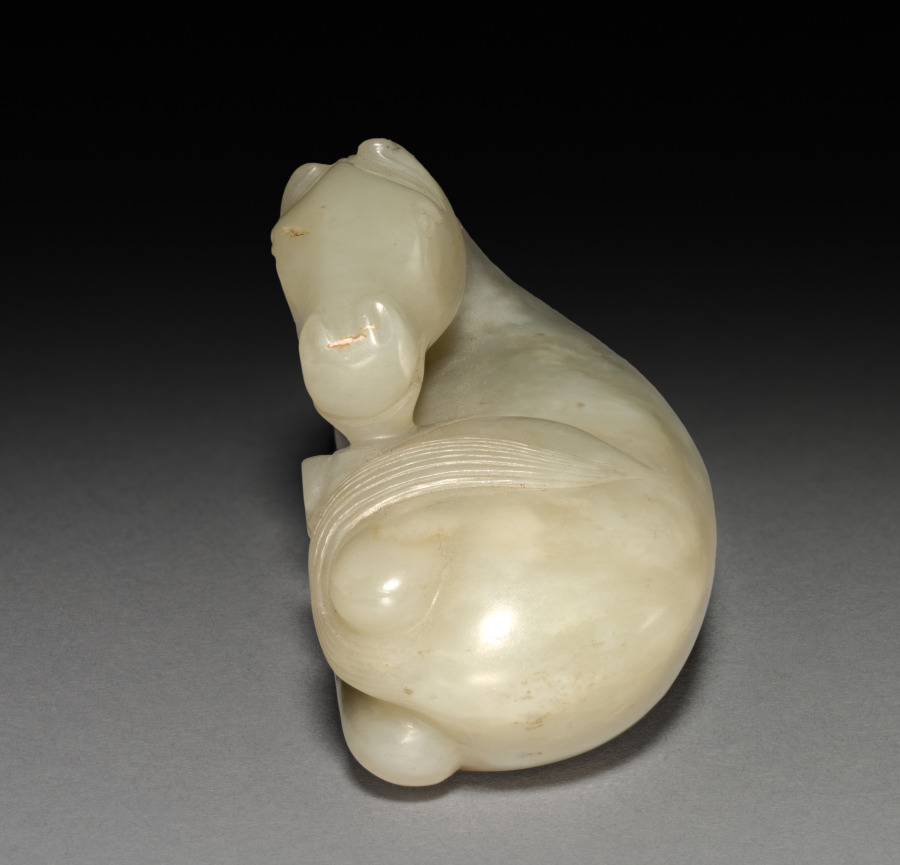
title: Horse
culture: China, Ming dynasty (1368-1644) - Qing dynasty (1644-1911)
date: 1600s or earlier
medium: jade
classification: Jade